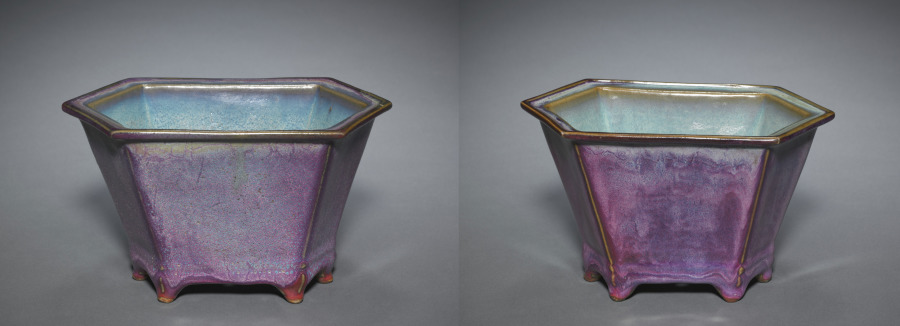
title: Pair of Hexagonal Flower Pots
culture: China, Henan province, Yuxian, Juntai, Ming dynasty (1368-1644)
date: 1300s–1400s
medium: porcelaneous stoneware, numbered Jun ware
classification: Ceramic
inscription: 八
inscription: 明窓用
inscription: 養心殿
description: This deep hexagonal flowerpot, one of a pair in the collection, is numbered "8" and bears additional inscriptions to indicate specifically the location of its usage within the palace: "for use in the Study of Illumination (Mingchuang yong)" within the "Hall of Cultivating the Mind (Yangxin Dian)" of the Forbidden City. The inscriptions seem to suggest the Qing imperial provenance of this pair.